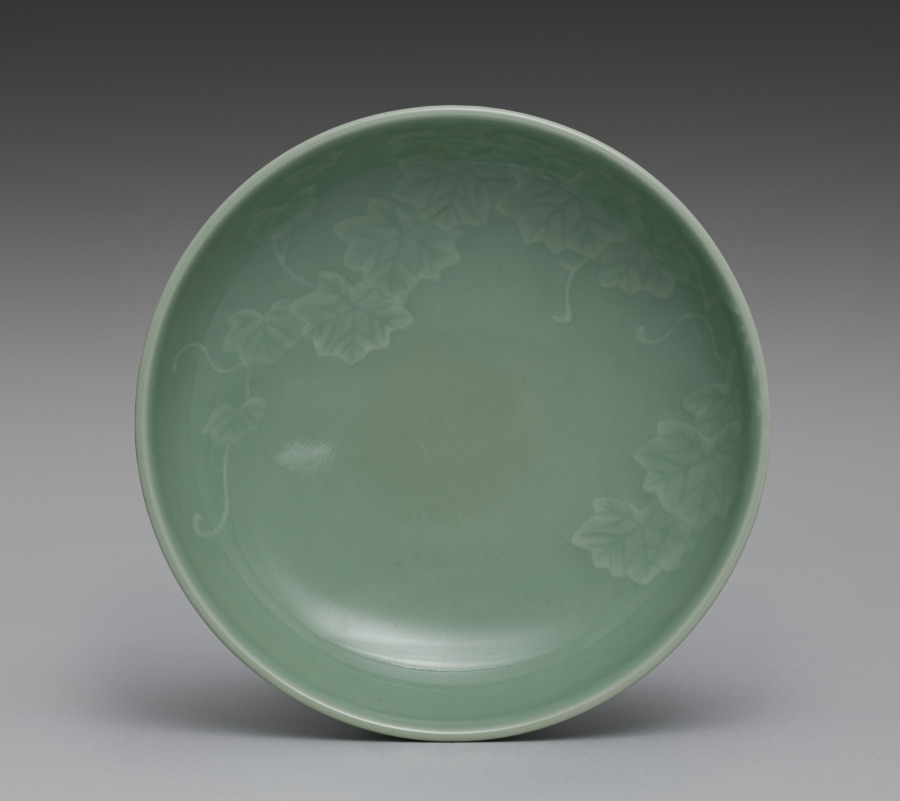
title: Dish from Dishes with Ivy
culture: Japan, Meiji period (1868–1912)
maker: Seifū Yohei III (Japanese, 1851–1914)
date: 1893–1914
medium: One from a set of five dishes; porcelain with green glaze and molded designs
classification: Ceramic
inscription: 清風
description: Yohei III’s main output for his sophisticated clientele was in the form of tea sets and dining sets. He often produced in pairs, sets of five, or sets of ten. This set of five dishes with a green glaze and designs of ivy vines in very low relief has unfortunately lost its box. These dishes are slightly larger than the other dishes, like CMA 2022.187, and so may have been not saucers but rather small plates for meals.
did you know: In his career, Seifū Yohei III created a range of dishes in green glazes.